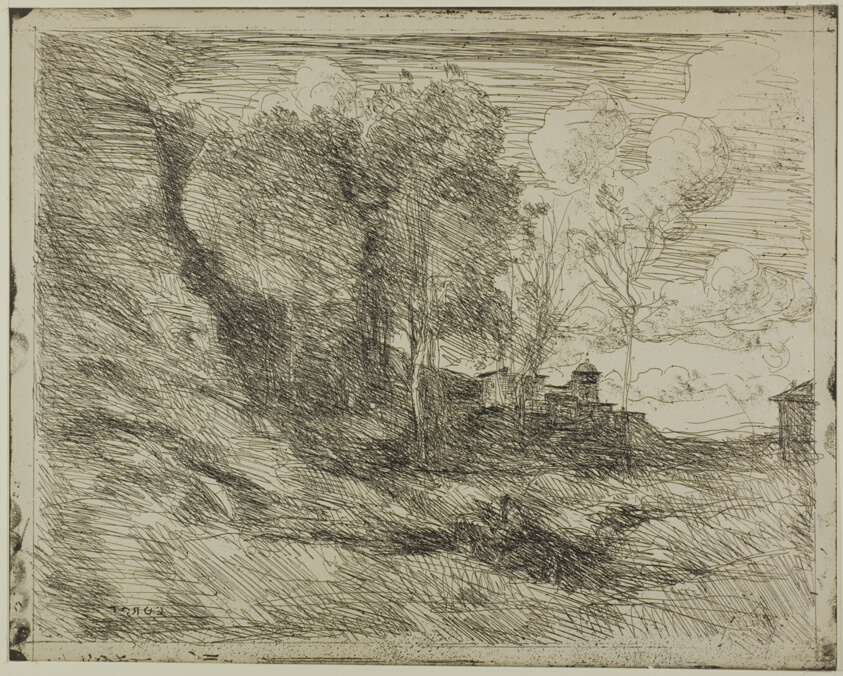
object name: Print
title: Souvenir of Ostia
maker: Jean-Baptiste-Camille Corot; French, 1796-1875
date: 1855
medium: Cliché-verre on ivory photographic paper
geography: France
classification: cliché-verre; print; prints and drawing